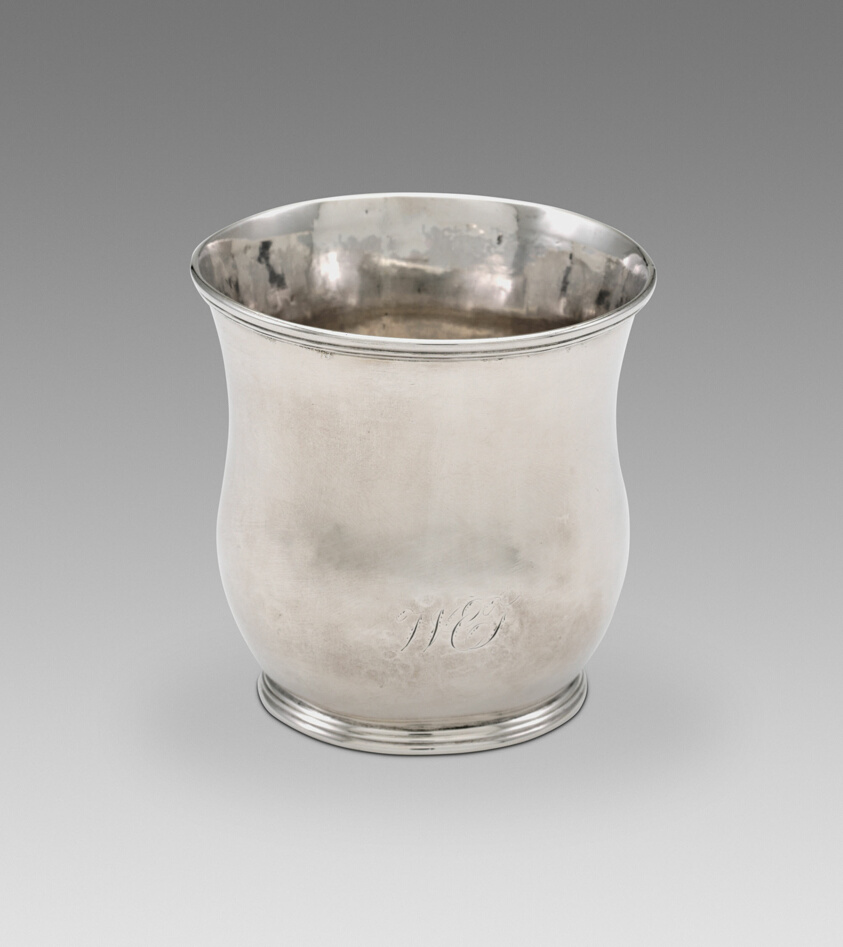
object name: Metalwork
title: Beaker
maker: William Gregg; American, 1800–1867; Petersburg, Virginia, Columbia and Charleston, South Carolina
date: 1818–42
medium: Silver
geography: South Carolina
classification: drinking vessel; silver; american decorative arts; american arts; decorative arts